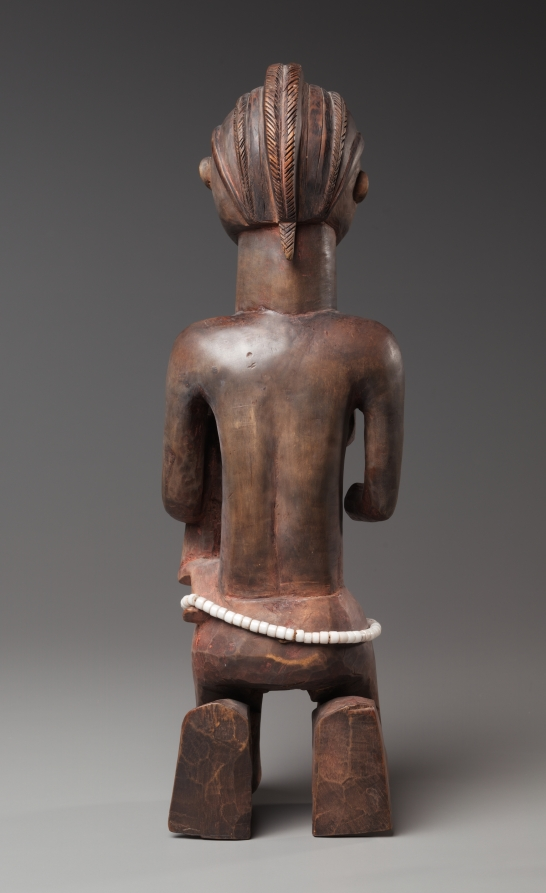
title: Mother-and-Child Figure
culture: Africa, Central Africa, Democratic Republic of Congo, Pende-style maker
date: late 1800s–early 1900s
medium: Wood, glass beads, upholstery studs, natural fiber, and pigment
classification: Sculpture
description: Wearing an elaborate lobed headdress and a beaded waistbelt, and having filed teeth and red-powdered skin, this maternity figure seems to have once carried an ax and a cup, wooden imitations of the two most important chiefly attributes. Perhaps together with a male counterpart, it was secretly kept inside the ritual house, serving as a guardian of the chief’s treasure. Its style places it in the westernmost corner of Pendeland, between the Lutshima and Kwilu rivers.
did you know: Eastern Pende carvers also once made larger mother-and-child sculptures to adorn the tops of chiefs' ritual houses.